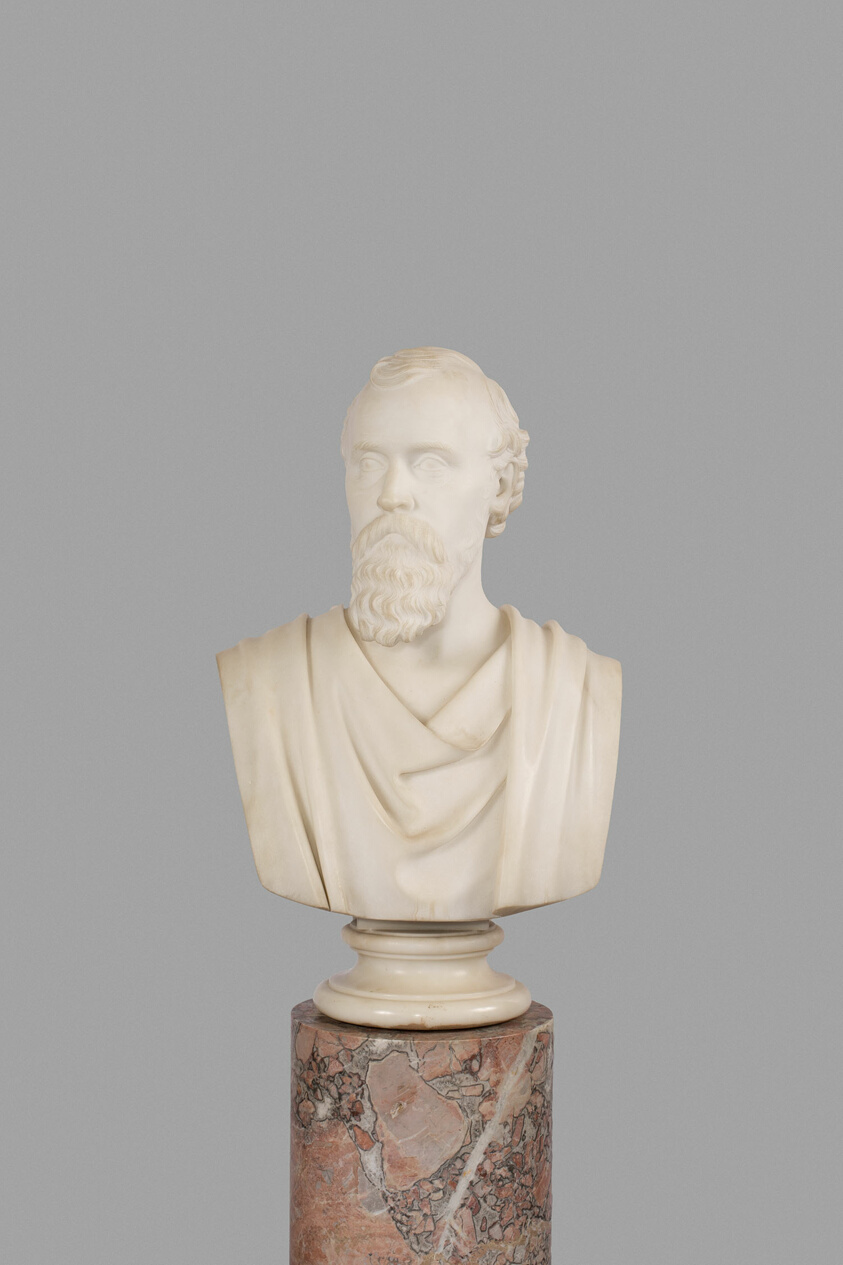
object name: Sculpture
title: Mr. Potter Palmer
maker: Hiram Powers (American, 1805–1873)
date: 1871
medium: Carrera marble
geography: United States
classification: sculpture; american arts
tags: Chicago, people, portraits